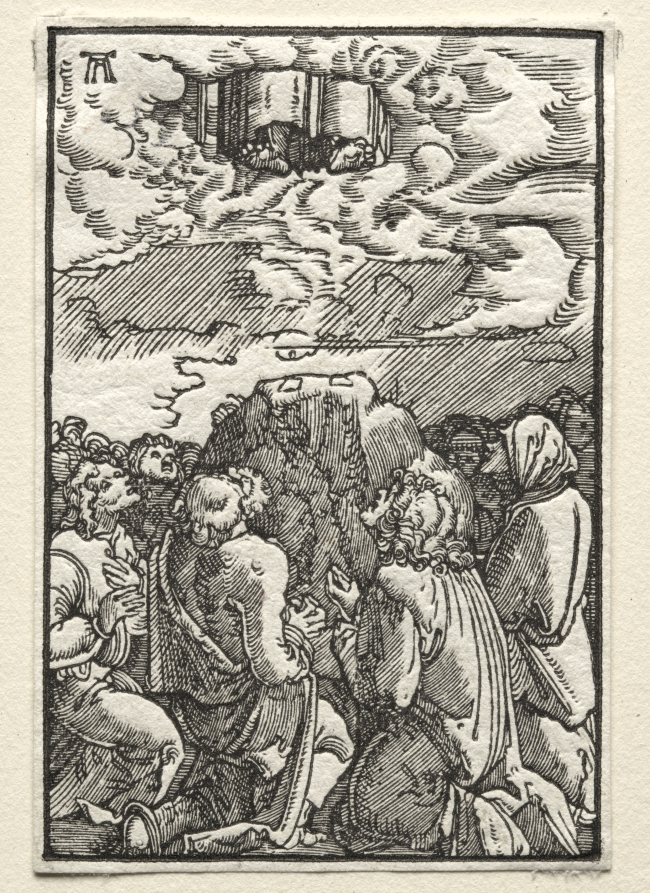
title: The Fall and Redemption of Man: The Ascension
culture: Germany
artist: Albrecht Altdorfer (German, c. 1480–1538)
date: c. 1515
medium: woodcut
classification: Print